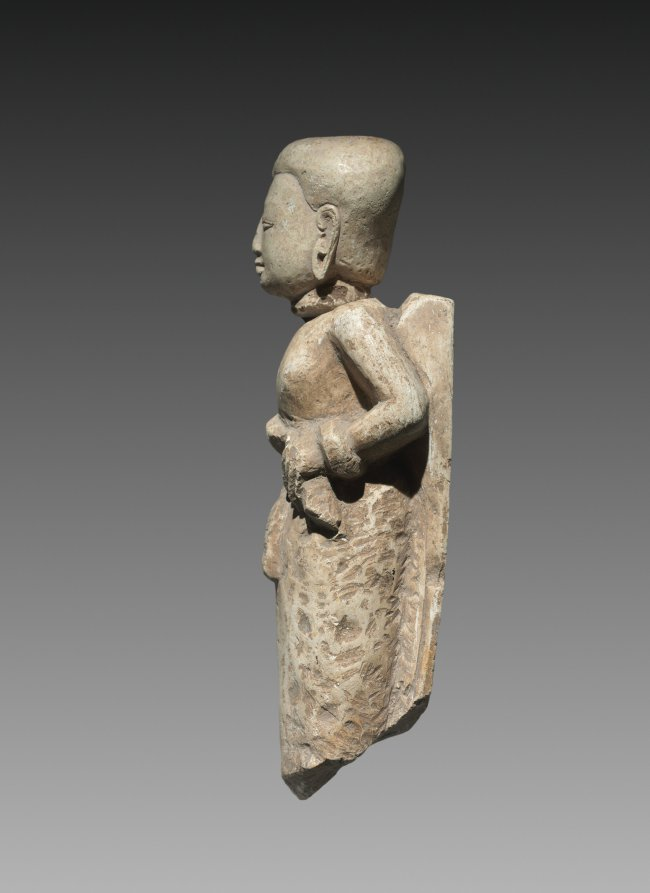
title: Female Figure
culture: Eastern Java, Majapahit Dynasty (1295-1478)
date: 1293–1478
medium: terracotta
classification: Sculpture